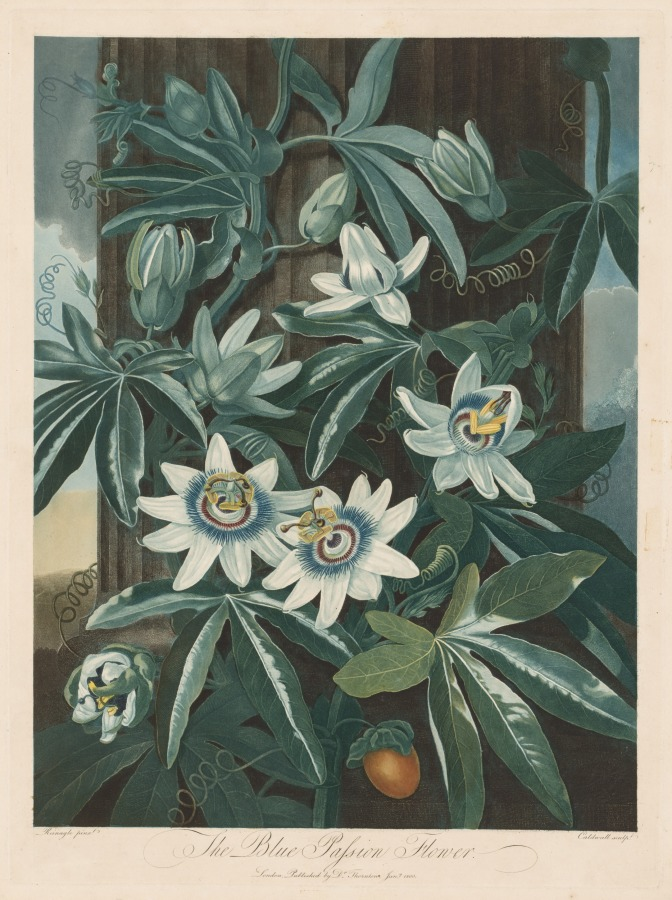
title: The Blue Passion-flower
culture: England, late 18th-early 19th Century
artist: Robert John Thornton (British, 1768–1837)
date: 1799–1807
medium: aquatint, stipple, line engraving, etching and roulette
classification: Print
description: In the 18th century, new engraving and etching techniques offered a variety of tonal effects that enhanced botanical prints. While mezzotint (in which the plate is roughened and then the engraver works from dark to light creating different values) and stipple (dots create values) make it possible to create the rich tonal scale and velvety texture of oil paint, aquatint imitates the delicacy and transparency of watercolor and ink wash.